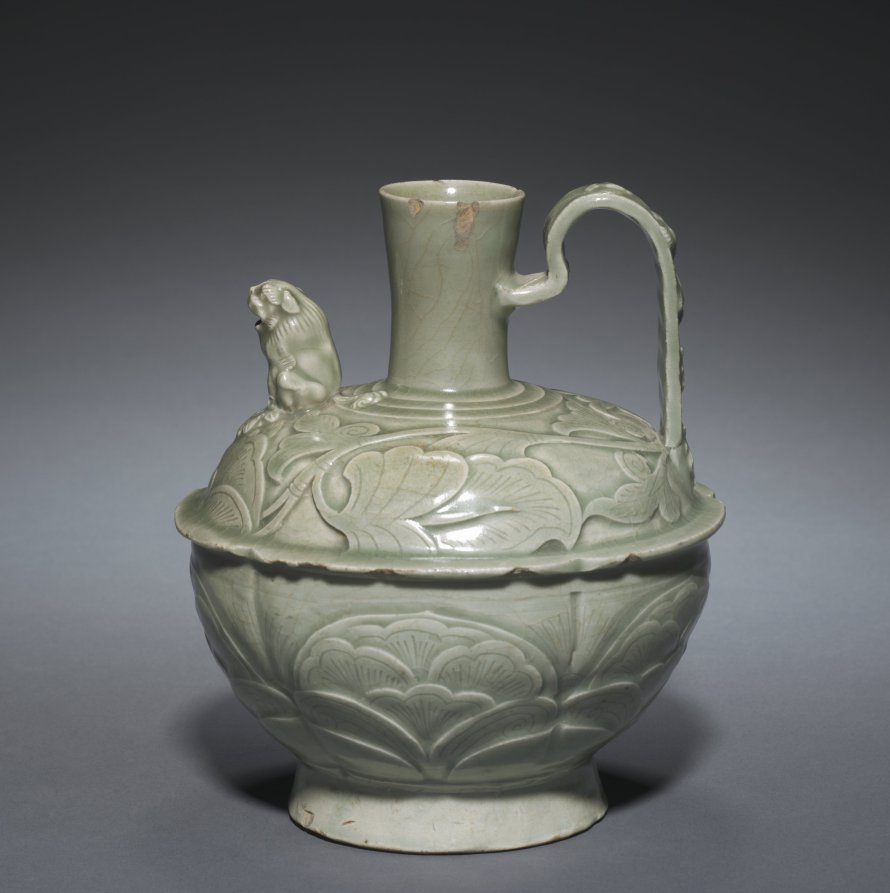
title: Ewer with a Lion-shaped Spout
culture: China, Shaanxi province, Tongchuan, Huangbaozhen, Five Dynasties period (907-960) or Northern Song dynasty (960-1126)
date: 900s–1000s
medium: green-glazed porcelaneous stoneware with modeled, carved and incised decoration, Yaozhou ware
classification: Ceramic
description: This remarkable ewer is most likely a very early and rare type of Yaozhou ware, with the shape and decoration recalling Tang metal ware. High quality pieces like this might have been sent as tribute to the Northern Song court. Yaozhou ware, or northern celadon, appeared to have been made in the north in emulation of the southern Yue ware. But its green glaze has a deep olive-green tone, and potters fully exploited the contrasting tones of the glaze over the incised and carved decoration to create rich textural effects.